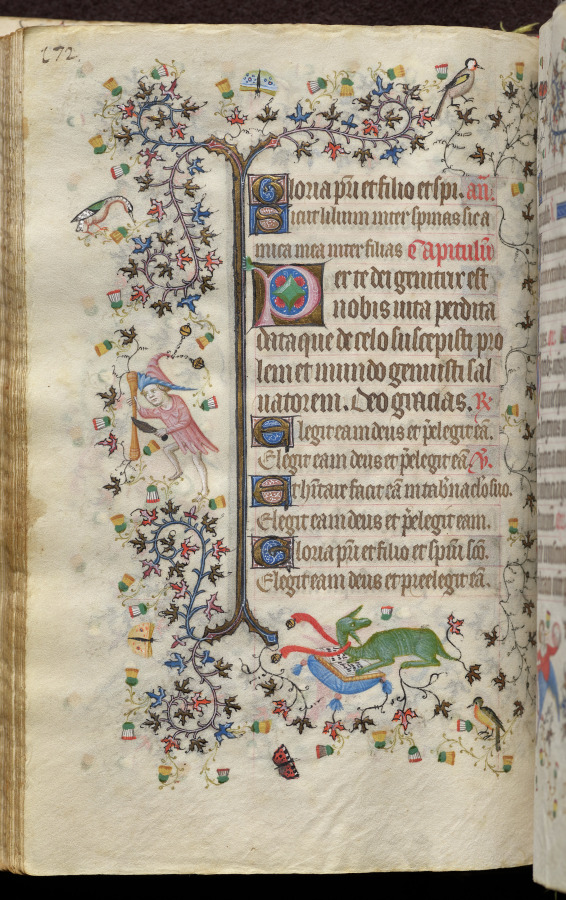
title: Hours of Charles the Noble, King of Navarre (1361-1425): fol. 86v, Text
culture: France, Paris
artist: Master of the Brussels Initials and Associates (French)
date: c. 1405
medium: ink, tempera, and gold on vellum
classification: Bound Volume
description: This precious volume was obviously highly prized by its owner, the French-born King of Navarre, who had his coat of arms painted on no less than twenty folios. Rather than directly commissioning this manuscript from a specific workshop, it seems that Charles the Noble acquired his book of hours -- perhaps ready-made for the luxury market -- while on a trip to Paris in 1404-05. A collaborative effort, six painting styles are evidenced within the pages of this codex, those of two Italians, two Frenchmen, and two Netherlanders. The painter who was responsible for the planning and decoration of the book, and who produced seventeen of the large miniatures, was a Bolognese artist known as the Master of the Brussels Initials. His principal assistant, responsible for most of the borders, was a Florentine who signed his name "Zecho" da Firenze on folio 208 verso.